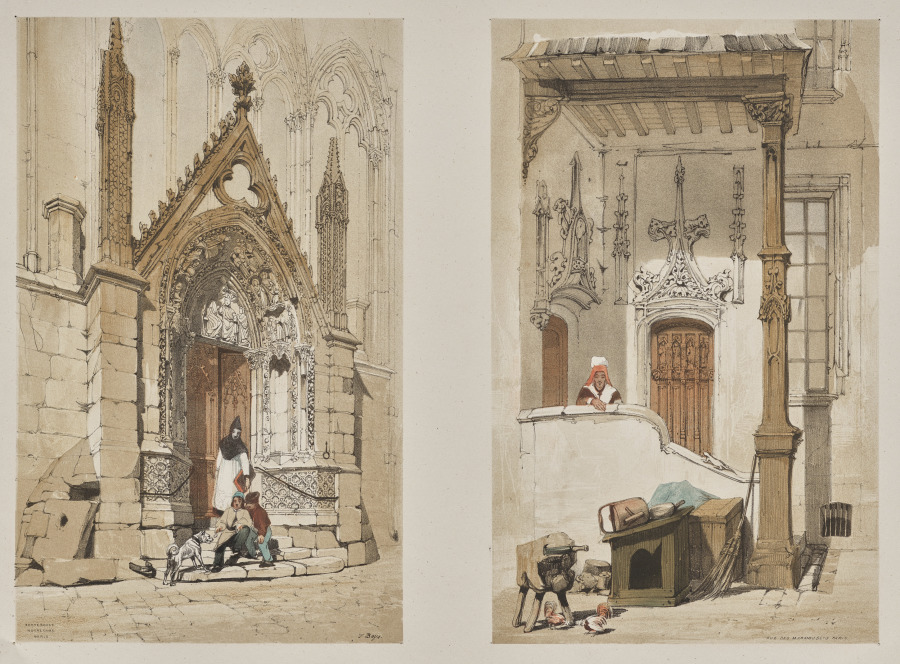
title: Picturesque Architecture in Paris, Ghent, Antwerp, Rouen: Porte Rouge, Nôtre Dame, Paris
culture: England, 19th century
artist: Thomas Shotter Boys (British, 1803–1874)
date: 1839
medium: lithograph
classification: Portfolio